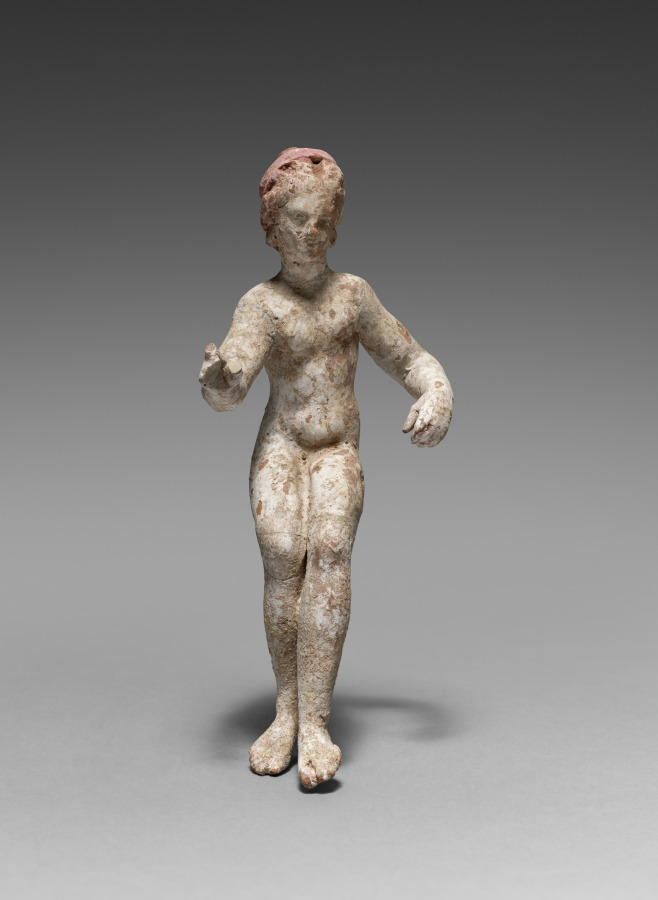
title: Figurine of a Nude Woman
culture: Greece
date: 400–200 BCE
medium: terracotta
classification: Sculpture